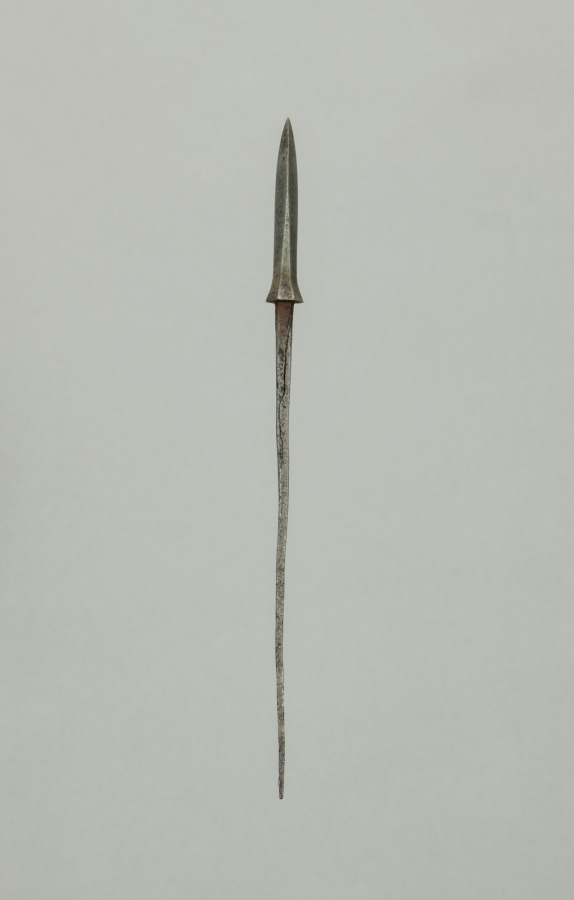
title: Arrow Point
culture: Japan, Edo period (1615–1868)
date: 1700s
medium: steel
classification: Arms and Armor